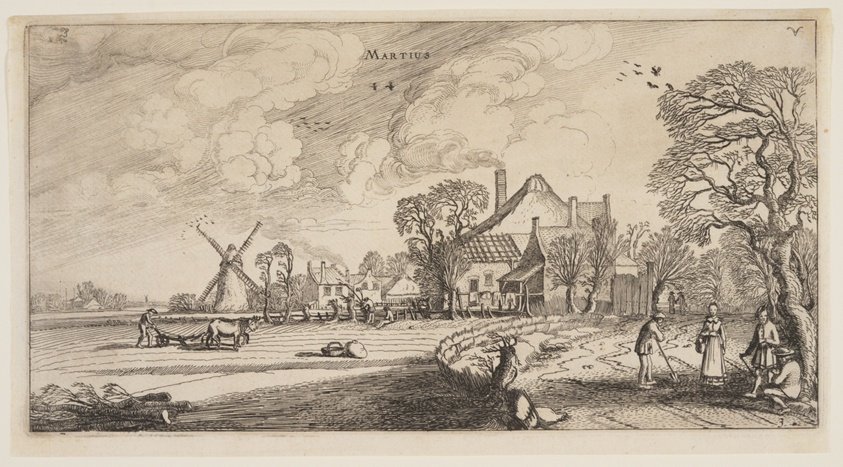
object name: Print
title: March, from The Twelve Months of the Year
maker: Jan van de Velde II (Dutch, c. 1593–1641); after Willem Buytewech (Dutch, c. 1591–1624)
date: 1616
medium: Etching on ivory laid paper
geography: Netherlands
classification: etching; paper; print; prints and drawing